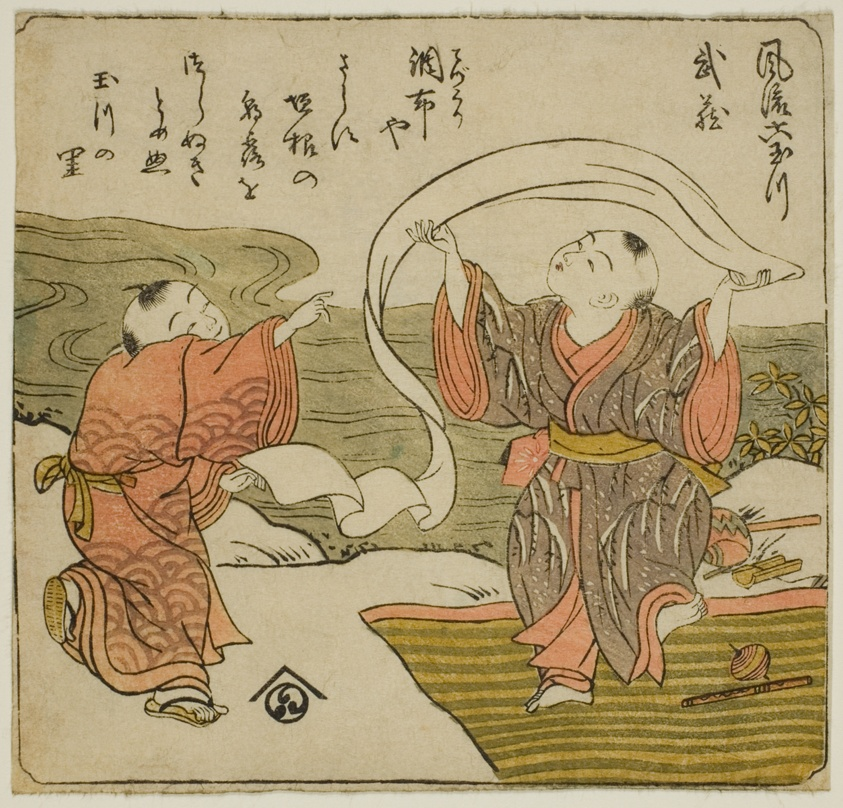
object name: Print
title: Musashi, from the series "Fashionable Six Jewel Rivers (Furyu Mu Tamagawa)"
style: Japanese (culture or style)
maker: Isoda Koryusai (Japanese, 1735-1790)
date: c. 1772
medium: Color woodblock print; koban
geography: Japan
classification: woodblock print; print; asian art